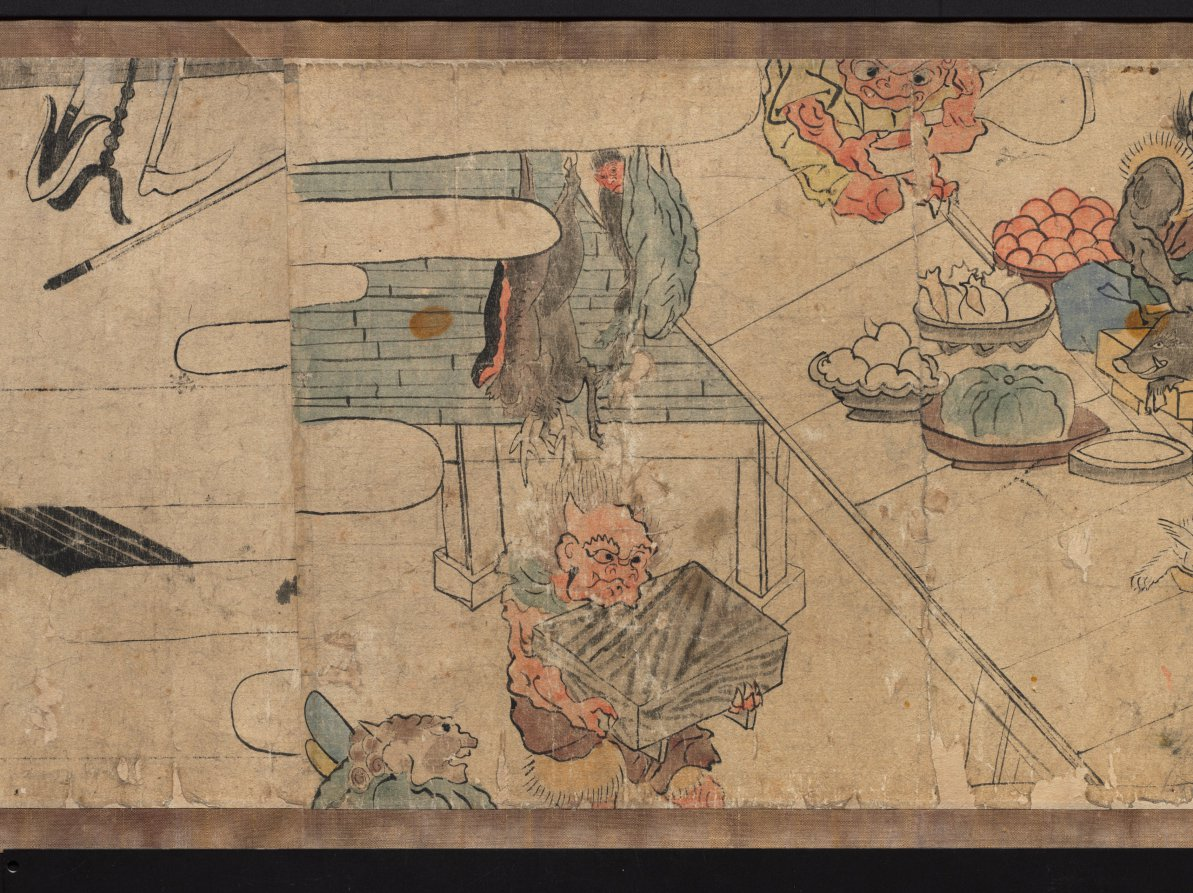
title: Oeyama Engi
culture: Japan, Edo period (1615–1868)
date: 1615–1868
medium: one of a pair of handscrolls; ink and color on paper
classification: Painting